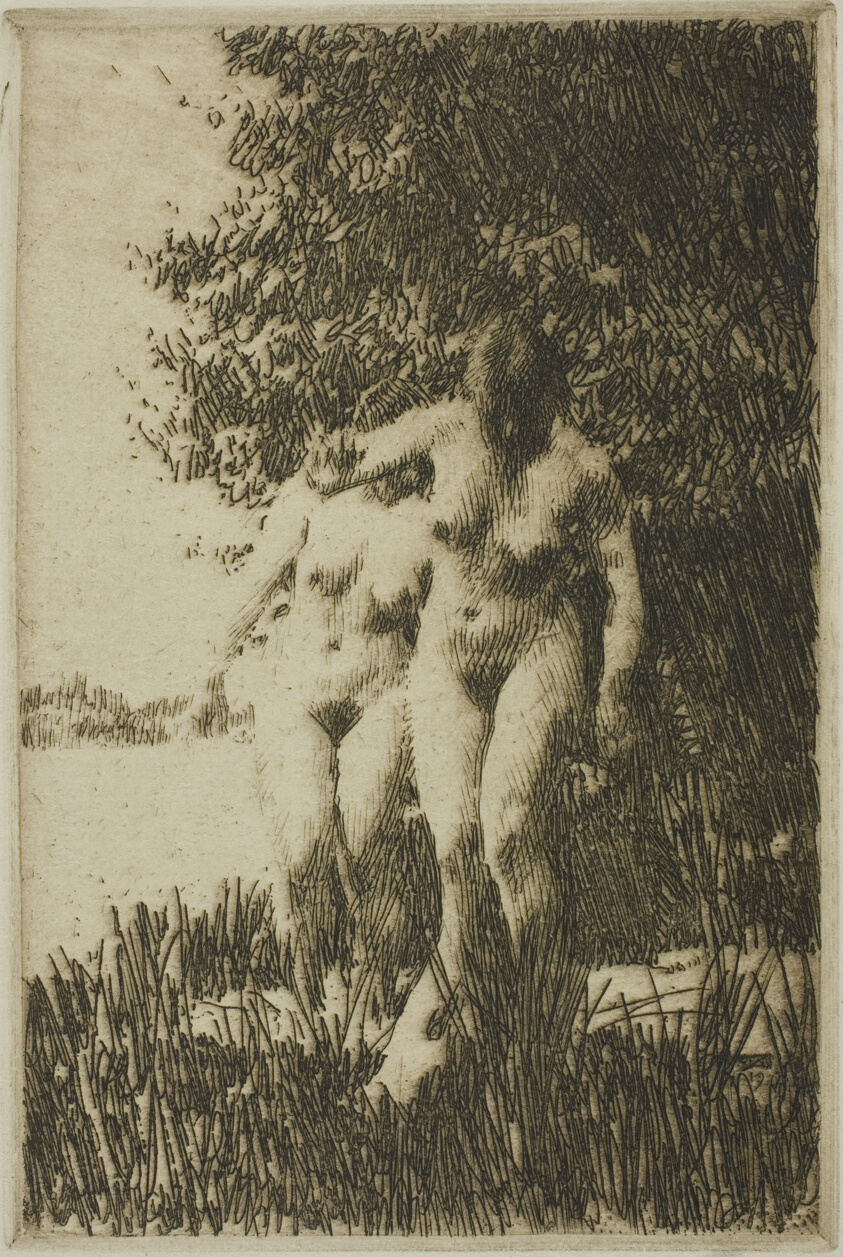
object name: Print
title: Alder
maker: Anders Zorn (Swedish, 1860-1920)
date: 1917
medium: Etching on ivory laid paper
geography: Sweden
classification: etching; print; prints and drawing